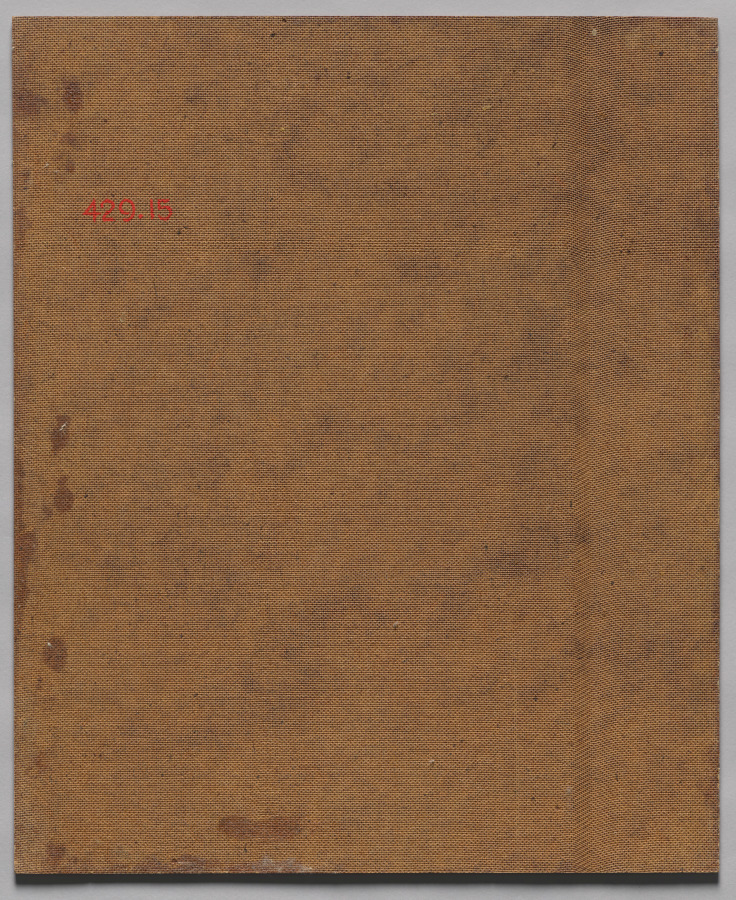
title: June Day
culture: America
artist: William Trost Richards (American, 1833–1905)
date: 1870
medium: oil on canvas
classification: Painting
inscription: signed lower left: Wm T. Richards. / 1870